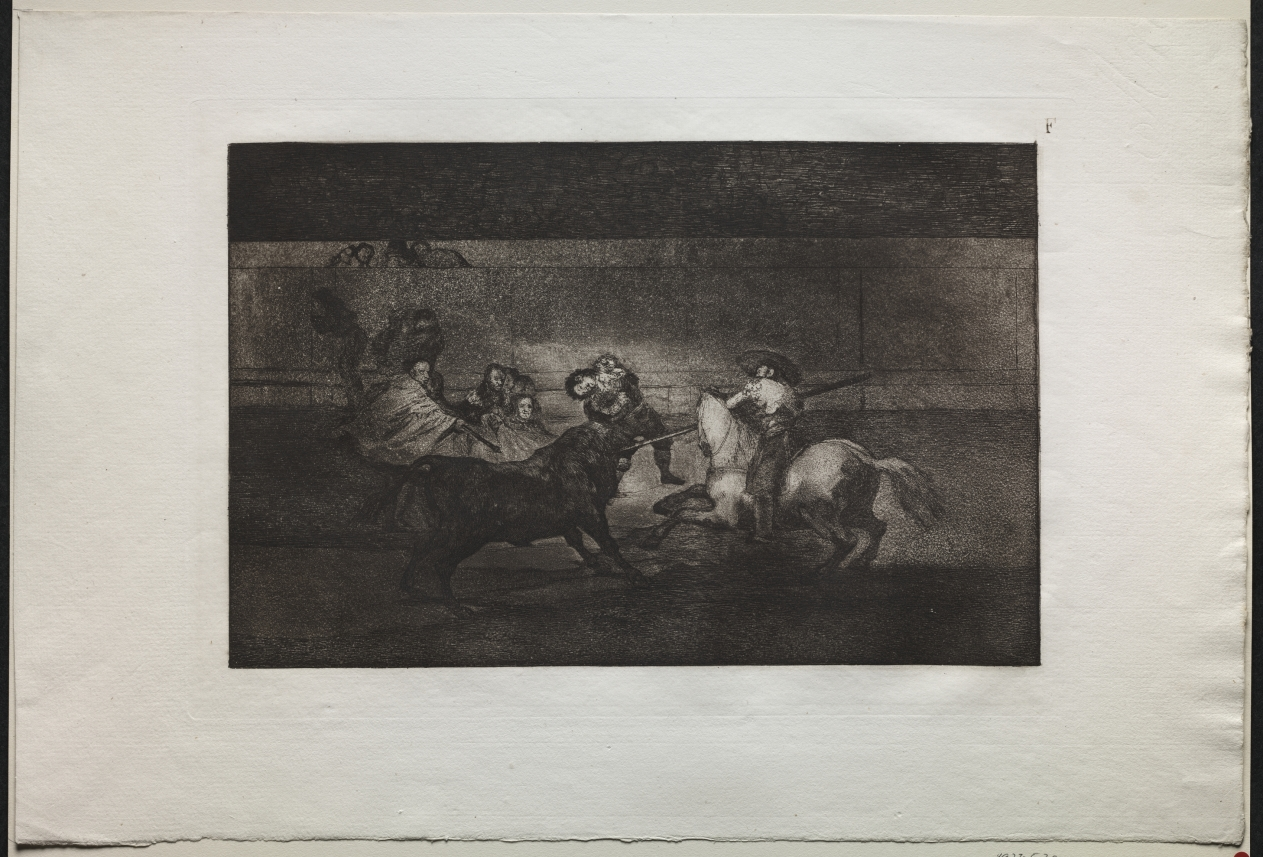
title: Bullfights: The Death of Pepe Illo (3rd Composition)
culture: Spain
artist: Francisco de Goya (Spanish, 1746–1828)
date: 1816, printed 1876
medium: engraving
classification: Print